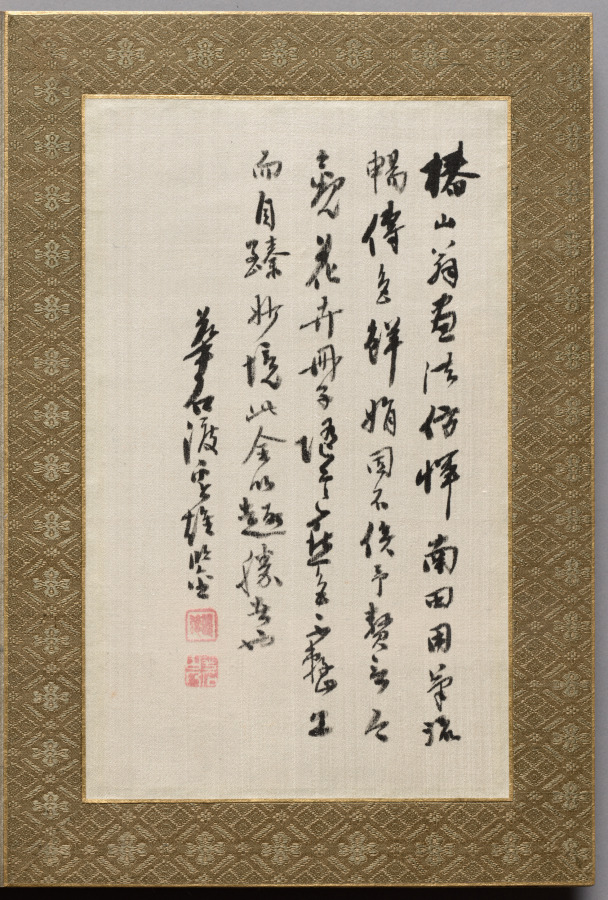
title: Preface from Flowers and Grasses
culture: Japan, Edo period (1615–1868)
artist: Tsubaki Chinzan (Japanese, 1801–1854)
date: 1841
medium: leaf from folding-album; ink on paper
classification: Painting